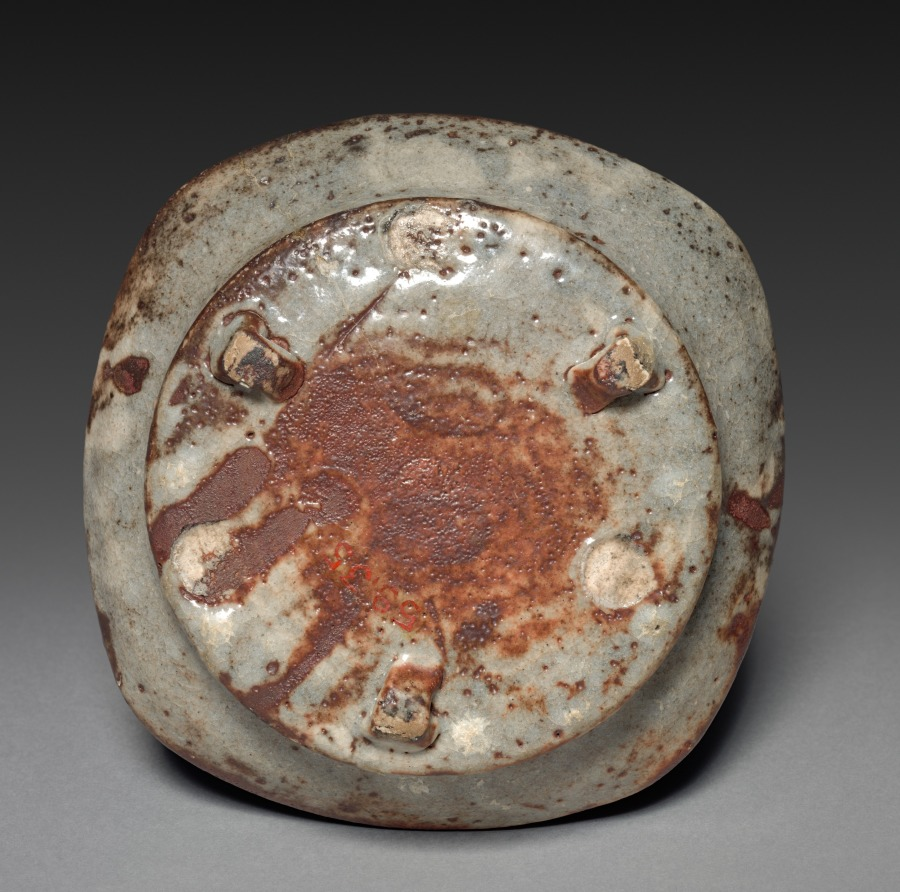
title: Dish with Design of Three Wild Geese in Flight: "Nezumi" Shino Ware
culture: Japan, Momoyama period (1573–1615)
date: c. 1600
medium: stoneware with underglaze iron slip decoration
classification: Ceramic